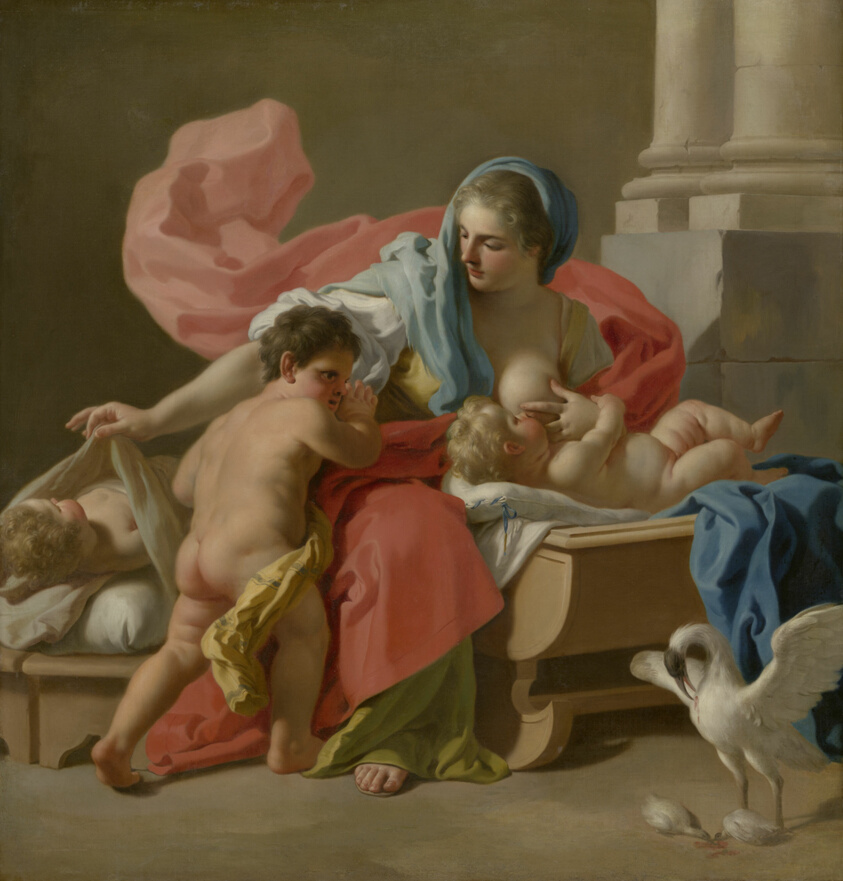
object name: Painting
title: Charity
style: 18th Century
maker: Francesco de Mura (Italian, 1696-1782)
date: 1743/44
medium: Oil on canvas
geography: Italy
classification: oil on canvas; oil paintings (visual works); paint; Italian; painting; european painting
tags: woman with children, woman, sleep, red (color), children, blue (color), blue, blood, bird, babies, architecture, architecture, architechture